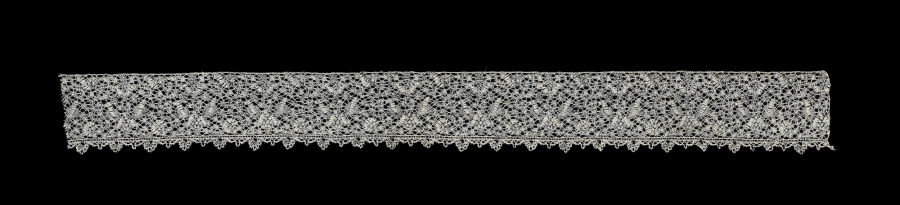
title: Lace Insertion and Edging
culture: Belgium, Binche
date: 1700s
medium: Bobbin lace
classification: Lace